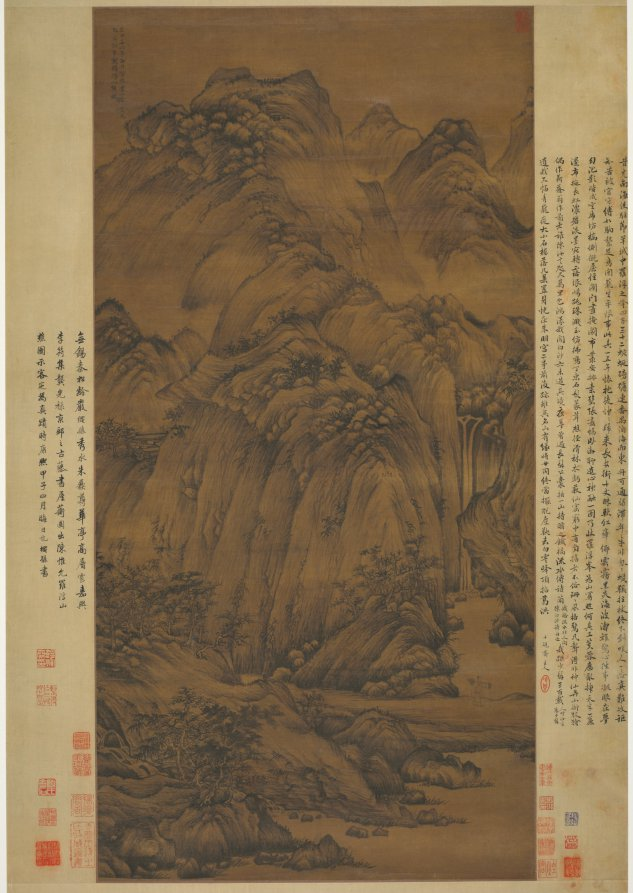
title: The Woodcutter of Luofu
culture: China, Yuan dynasty (1271-1368)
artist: Chen Ruyan (Chinese, c. 1331–1371)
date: 1366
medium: Hanging scroll; ink on silk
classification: Painting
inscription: 至正二十六年（1366）正月望後廬山汝言為思齊斷事寫羅浮山樵圖。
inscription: 2 colophons and 18 additional seals: 5 seals of Wang Shimin 王時敏 (1592–1680); 2 seals of Gong Xianglin 龔翔麟 (1658–1733); 1 colophon, dated 1684, of Yan Shengsun 嚴繩孫 (1623–1702); 1 colophon and 1 seal of Huang Ren (1683–1768); 2 seals of Lu Shusheng 陸樹聲 (3rd son of Lu Xinyuan 陸心源); 2 seals of T'ao Kuang; 1 seal of Tan Jing 譚敬 (20th c.); 3 seals of Zhang Heng 張珩 (1915–1963); 2 seals unidentified.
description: This landscape illustrates the traditionalism of Chinese painting: while the brush manner is novel, the composition is based on early Song dynasty (960-1127) models. The soft raveling brushstrokes and lumpy rock shapes are characteristic of the new 14th-century stylistic expression.